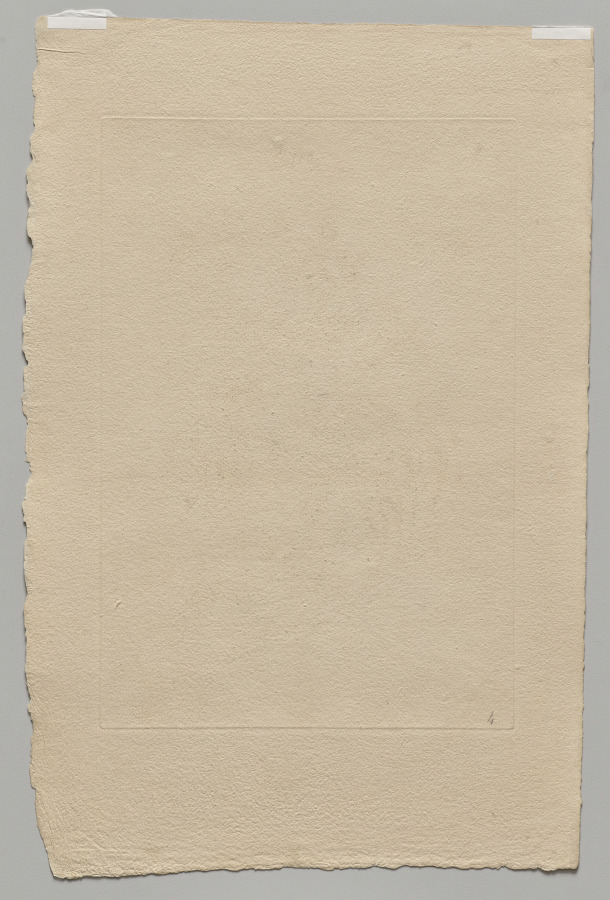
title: Persian Flowers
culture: France, 18th century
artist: Jean Baptiste Pillement (French, 1728–1808)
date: 1755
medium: etching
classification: Print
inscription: Watermark, undetermined words/letters along left edge.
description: Jean Baptiste Pillement was one of the most influential designers of the Rococo period, known for his varied and prolific chinoiseries (European variants of Chinese and Japanese motifs). His designs were spread throughout Europe primarily via their translation into prints. This print is one of a set of six etched by Pillement himself. Each depicts a so-called “Persian” flower, largely fantasies, presenting strange, alienlike floral forms that could be adapted to various uses from textiles to wall decorations.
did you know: The artist Jean Baptiste Pillement was employed by Marie Antoinette to create decorations for her legendary retreat, the Petit Trianon, at Versailles.